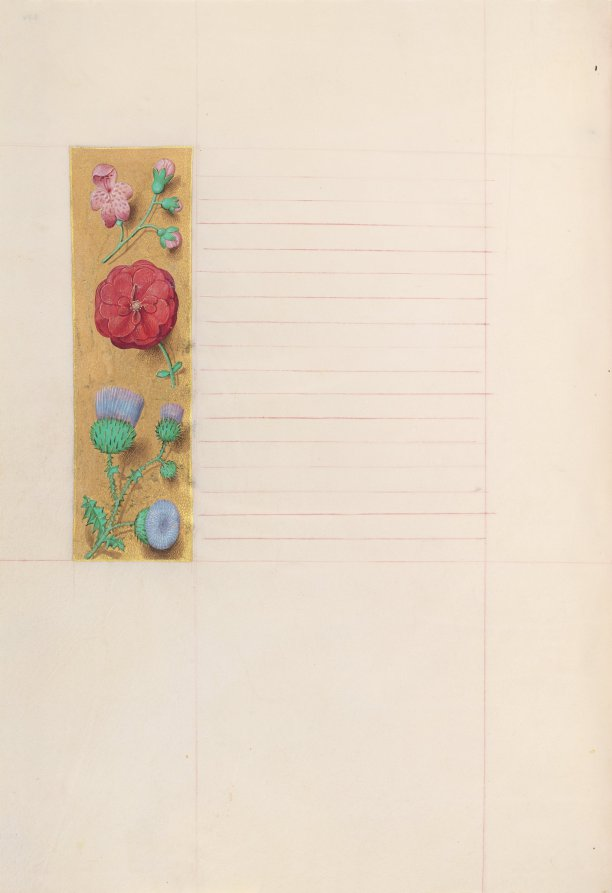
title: Hours of Queen Isabella the Catholic, Queen of Spain: Fol. 274v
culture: Flanders, Ghent and Bruges, late 15th century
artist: Master of the First Prayerbook of Maximillian (Flemish, c. 1444–1519)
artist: and Associates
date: c. 1500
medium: ink, tempera, and gold on vellum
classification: Bound Volume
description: This manuscript was illuminated by a circle of at least five highly organized manuscript painters active in the Flemish cities of Ghent and Bruges. The principal illuminator was Alexander Bening, who painted the majority of the book's miniatures. Manuscripts produced by this circle of artists are renowned for the decoration of their borders, which typically feature a rich variety of realistically-painted flowers, birds, and butterflies. This prayer book, called a book of hours, was intended not for a cleric, but for the private devotions of a lay person-in this case, Isabella the Catholic, Queen of Spain (1451-1504). Isabella's coat of arms embellishes the book's frontispiece. It is unlikely that the book was commissioned by the Queen herself; rather, she probably received it as a diplomatic gift from someone courting her patronage, perhaps Cardinal Francisco Jimenez de Cisneros. A Franciscan friar, Jimenez was dependent upon Isabella for his advancement, first to the post of Queen's confessor in 1492, and then to Archbishop of Toledo in 1495.